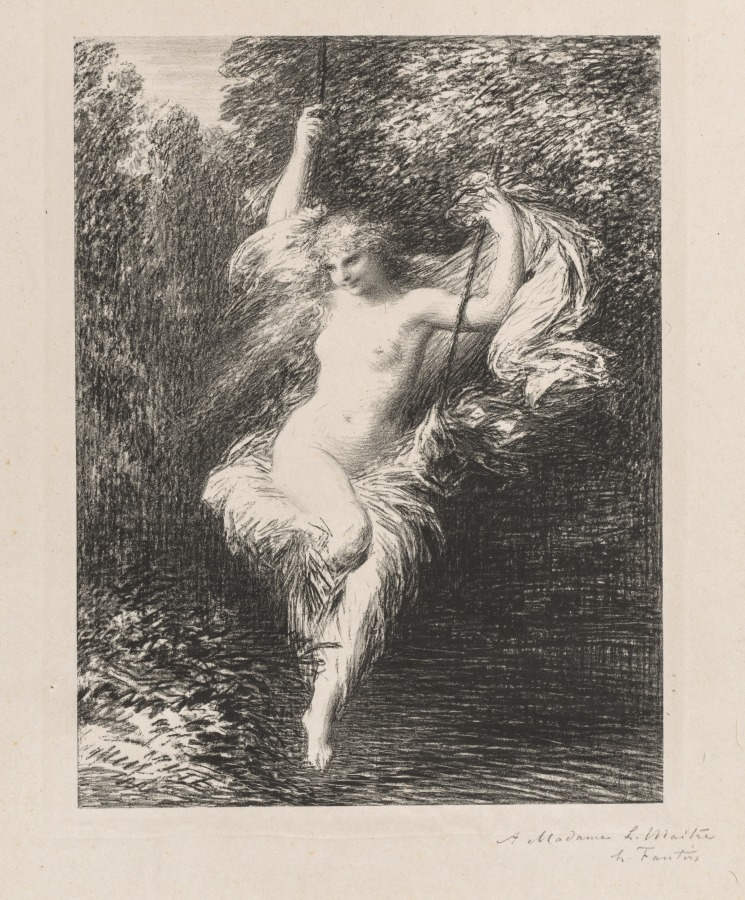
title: Sarah la Baigneuse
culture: France, 19th century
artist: Henri Fantin-Latour (French, 1836–1904)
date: 1892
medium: lithograph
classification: Print